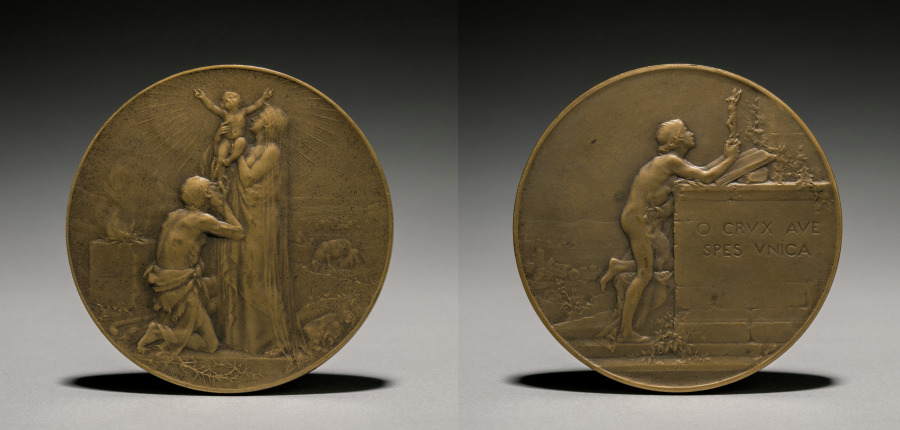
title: Medal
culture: France, 19th century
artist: Jules Dupré (French, 1811–1889)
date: 1800s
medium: bronze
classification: Metalwork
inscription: reverse - "O Crux ave spes unica."